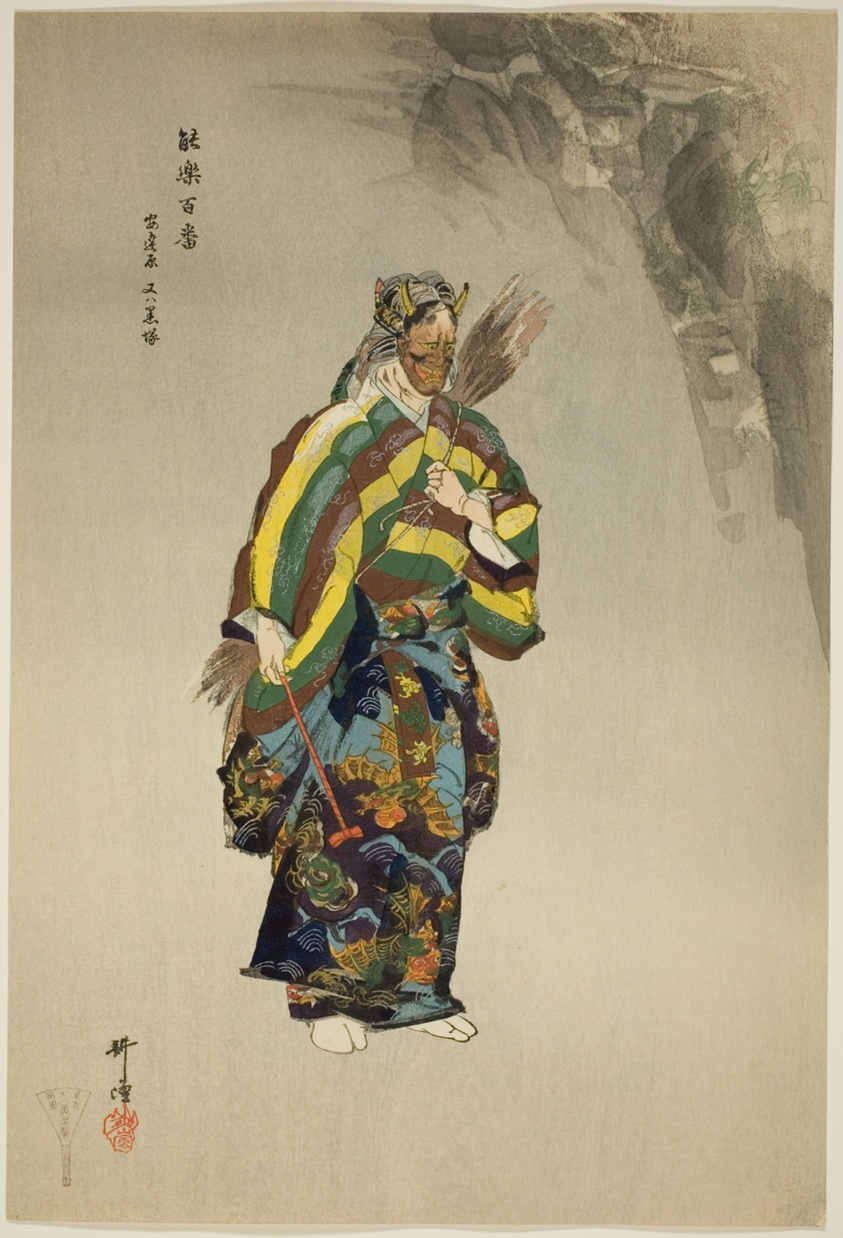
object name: Print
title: Adachiga Hara, from the series "One Hundred No Dramas (Nogaku hyakuban)"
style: Japanese (culture or style)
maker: Tsukioka Kogyo; Japanese, 1869-1927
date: 1898/1903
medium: Color woodblock print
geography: Japan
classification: woodblock print; print; asian art